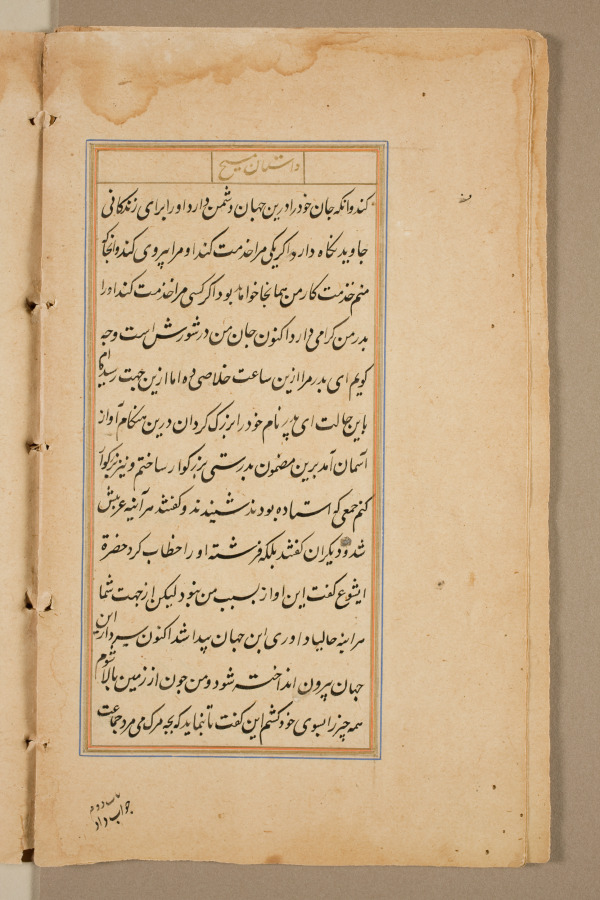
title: Text page from a Mirror of Holiness (Mir’at al-quds) of Father Jerome Xavier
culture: Mughal India, Allahabad, made for Prince Salim (1569–1627)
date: 1602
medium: Ink and gold on paper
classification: Manuscript